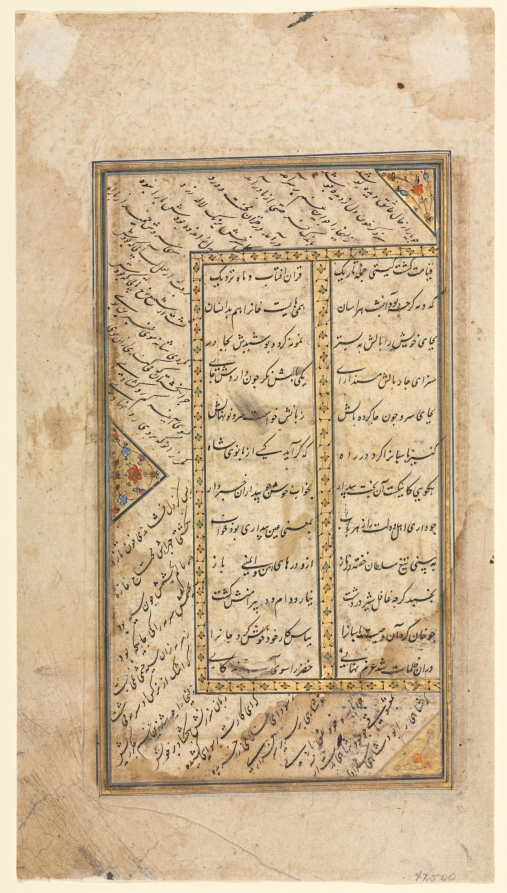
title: Persian verses from a Haft Awrang (Seven Thrones) of Jami (d. 1492) (recto)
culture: Iran, probably Shiraz, Safavid period (1501-1722)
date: mid-1500s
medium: opaque watercolor, ink, and gold on paper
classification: Manuscript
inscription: Script: Nasta'liq